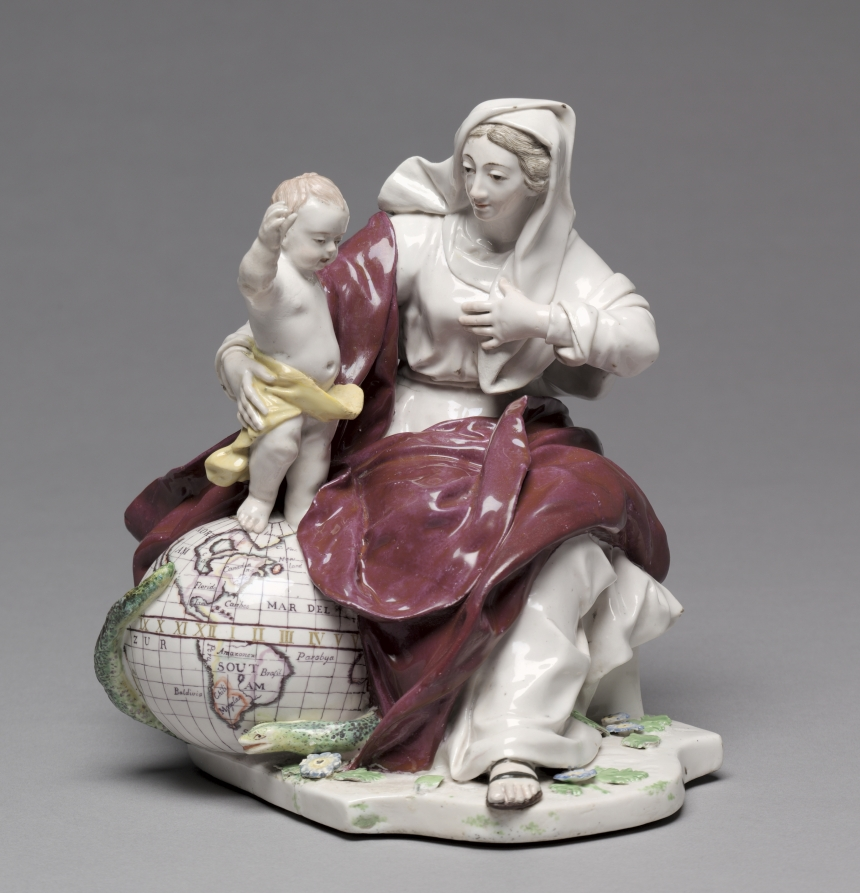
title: Madonna and Child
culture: England, Chelsea, 18th century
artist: Chelsea Porcelain Factory (Britain, London, 1745–84)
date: c. 1755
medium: porcelain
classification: Ceramic